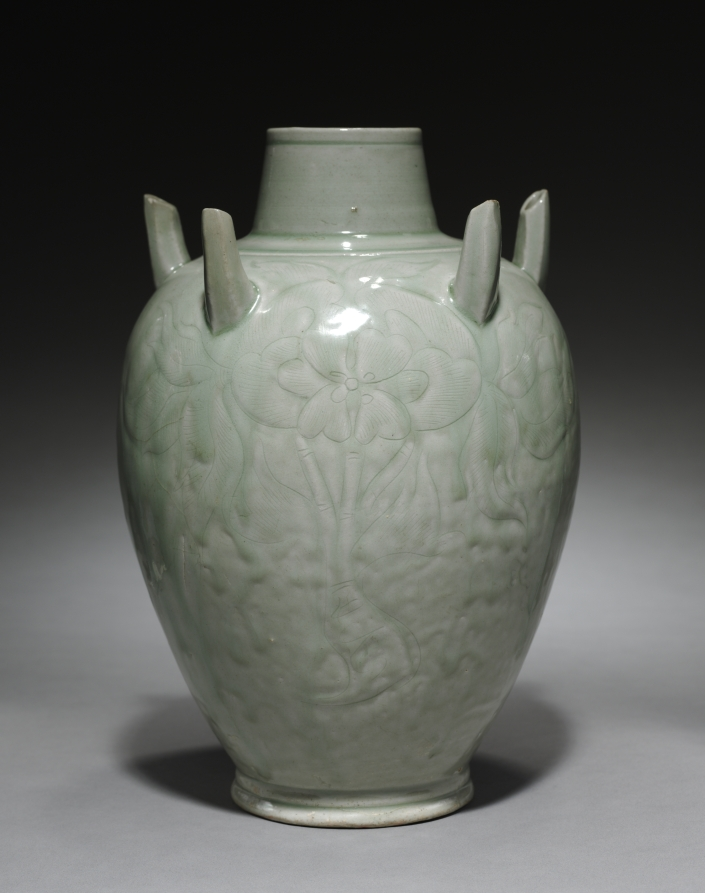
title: Vase with Peonies and Five Spouts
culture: China, Zhejiang province, Hangzhou, Southern Song dynasty (1127-1279)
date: 900s–1000s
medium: green-glazed porcelaneous stoneware with incised decoration, Yue ware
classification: Ceramic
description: "In full autumn wind and dew the kilns of Yue open; And a thousand peaks are despoiled of their halcyon green" (translated by S. W. Bushell). These 9th-century poetic lines glorify the highly prized green-glazed Yue wares of the Tang period. This later example has a pale green glaze that is glassy and consistent, which indicates a precise control of the glaze components as well the kiln atmosphere by reducing the amount of oxygen at some stage during the firing.